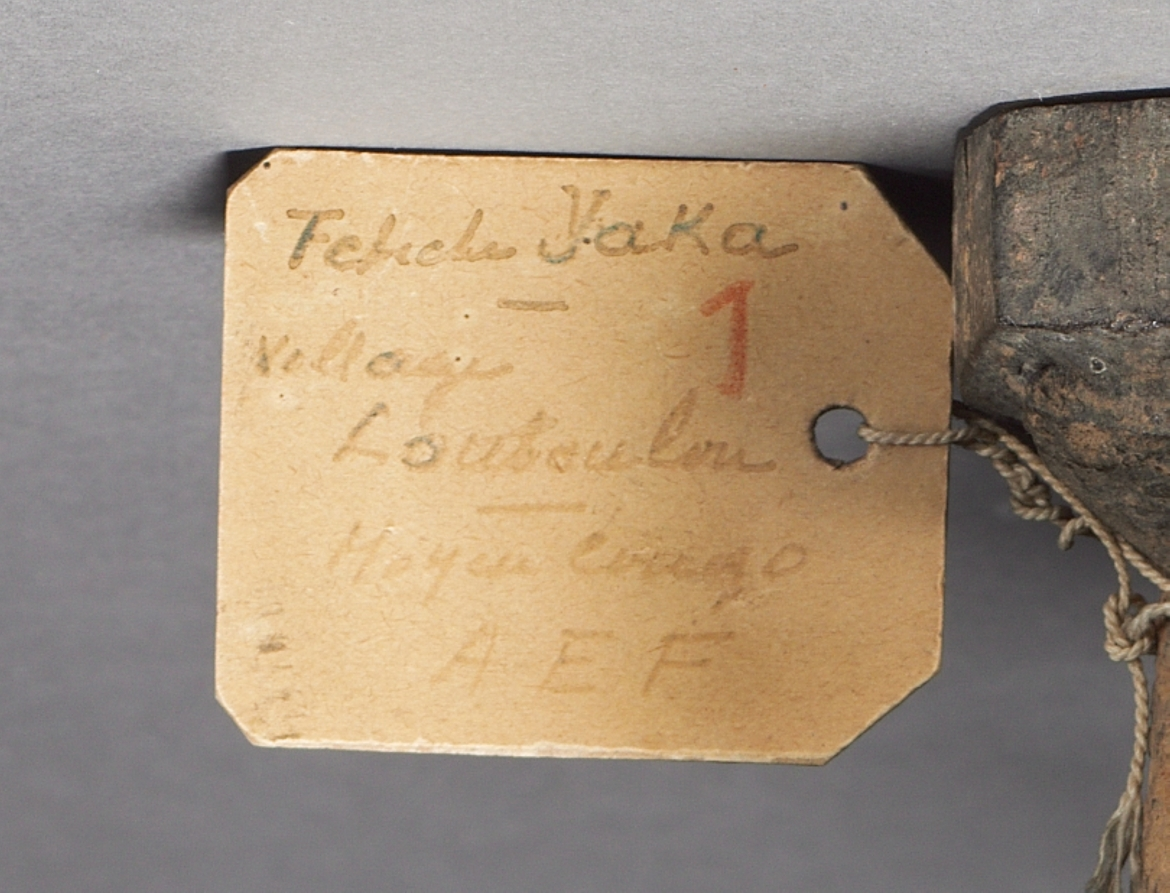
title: Power figure (nkisi)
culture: Africa, Central Africa, Republic of the Congo, Kongo-style maker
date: late 1800s-early 1900s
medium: Wood, metalized glass, organic materials (including resin), feathers, plant fibers, iron, and copper alloy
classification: Sculpture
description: One of seven minkisi figures previously in the René and Odette Delenne collection, this object contained medicines in which an ancestral spirit was believed to reside. This figure is one of the two tallest in the collection. Feathers of a bird of prey adorn its head, with two small guns pointing upward and a third hanging down. It had belonged to “the sorcerer of Louboulou.”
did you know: This is one of two tallest in the collection of spiritual figurines loaded with gunpowder to shoot at witches: nduda, or “night guns.”